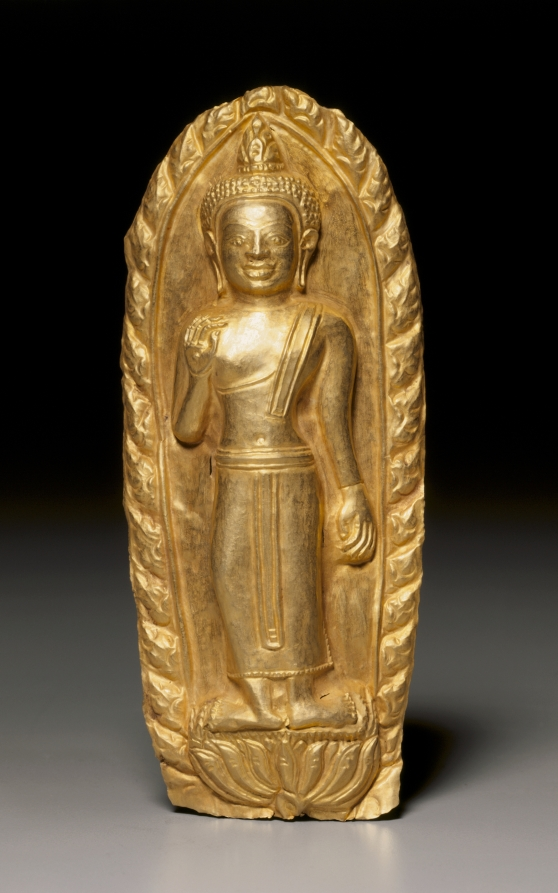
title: Standing Buddha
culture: Southern Myanmar (Burma), Pegu, or northwestern Thailand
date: 1100s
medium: gold repoussé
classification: Metalwork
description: Along with manuscripts, small-scale images of the Buddha could be commissioned by pilgrims or devotees and offered to a monastery in connection with a vow or the consecration of a sacred monument or object. The Buddha stands on a lotus flower that indicates his transcendence above ordinary beings. He is surrounded by flames that communicate his radiance and the intensity of the heat or power he acquired through meditation and discipline. His hands are in the mudra communicating the transmission of the teachings.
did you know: Pegu, the capital of the Mon empire, is on the south-central coast of Myanmar.